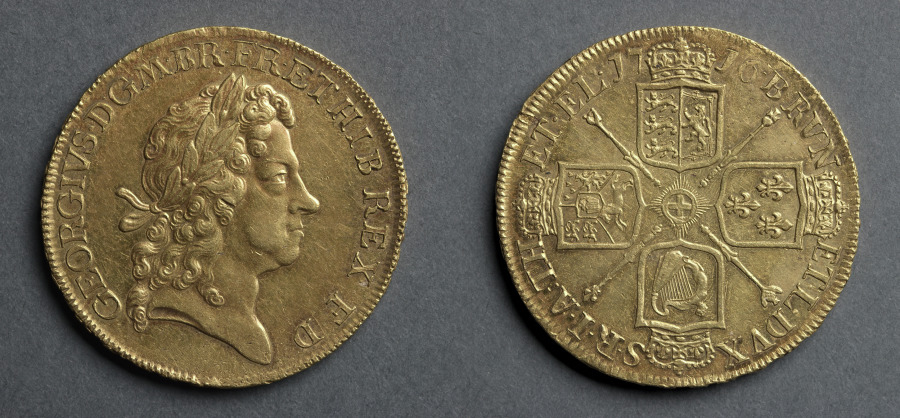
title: Five Guineas: George I (obverse); Shields and Star of the Order of the Garter (reverse)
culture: England, George I, 1714-1727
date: 1716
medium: gold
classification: Coins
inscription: GEORGIVS.D.G.M.BR.FR.ET.HIB.REX.F.D.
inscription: BRVN ET L DVX S R I A TH ET EL 1716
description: The Act of the Union of 1706 by Queen Anne added the arms of Scotland to those of England. The shields now read as England & Scotland, France, Ireland, and Hanover. Around the shields the many titles of the king are abbreviated to sometimes only one letter: BRVN ET·L·DVX S·I·R·A·TH ET·EL Duke of Brunswick and Lueneburg, Arch Treasurer and Prince Elector of the Holy Roman Empire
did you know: In the center of the shields is the symbol of the Order of the Garter, an order of chivalry founded by Edward III of England in 1348.